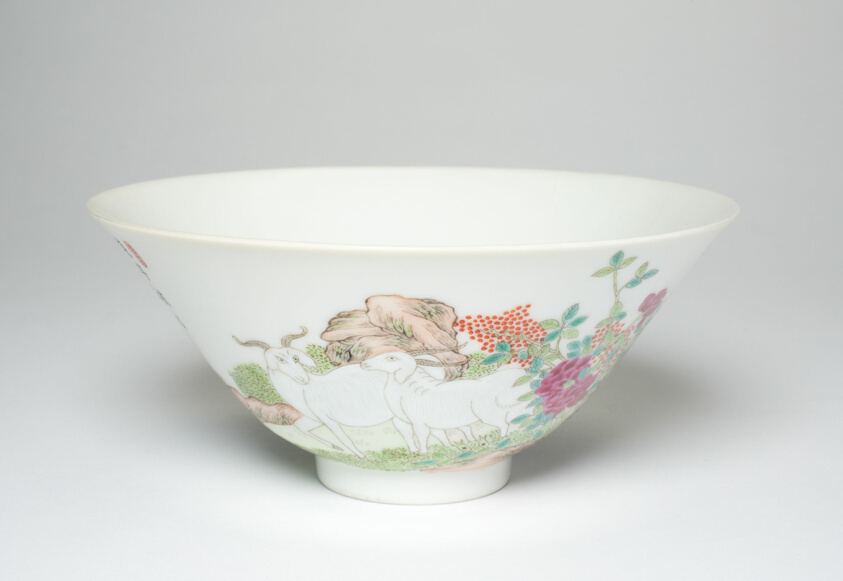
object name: Vessel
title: Bowl with Goats among Flowering Peonies, Pomegrenates, and Cherry Blossoms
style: Chinese (culture or style)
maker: China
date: Qing dynasty (1644–1911), Daoguang reign mark and period (1821–1850)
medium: Porcelain painted in overglaze enamels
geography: China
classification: bowl; porcelain; dish (vessel); asian art; ceramics; vessel